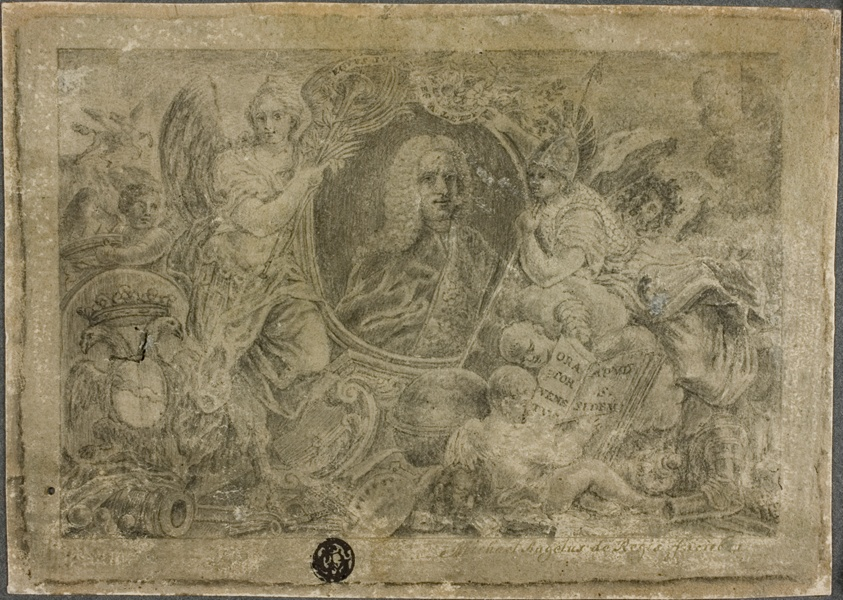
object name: Drawing and Watercolor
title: Oval Portrait Bust Held by Allegorical Figures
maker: Unknown Artist; European, n.d.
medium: Black chalk with brush and gray wash, on cream laid paper, laid down on board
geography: Europe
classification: graphite; drawings (visual works); prints and drawing